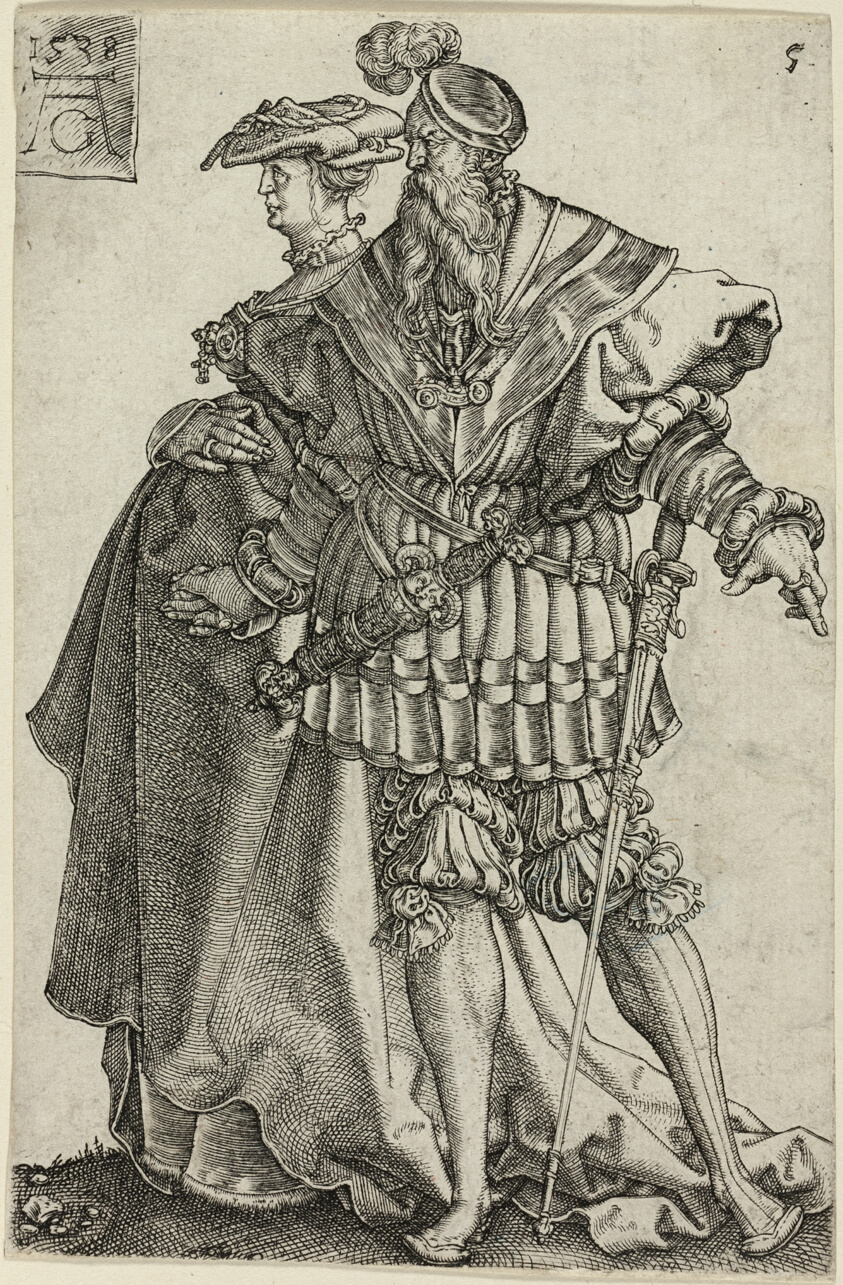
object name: Print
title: Dancing Couple, plate five from The Large Wedding-Dancers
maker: Heinrich Aldegrever (German, 1502-c.1560)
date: 1538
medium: Engraving in black on ivory laid paper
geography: Germany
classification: engraving; print; prints and drawing